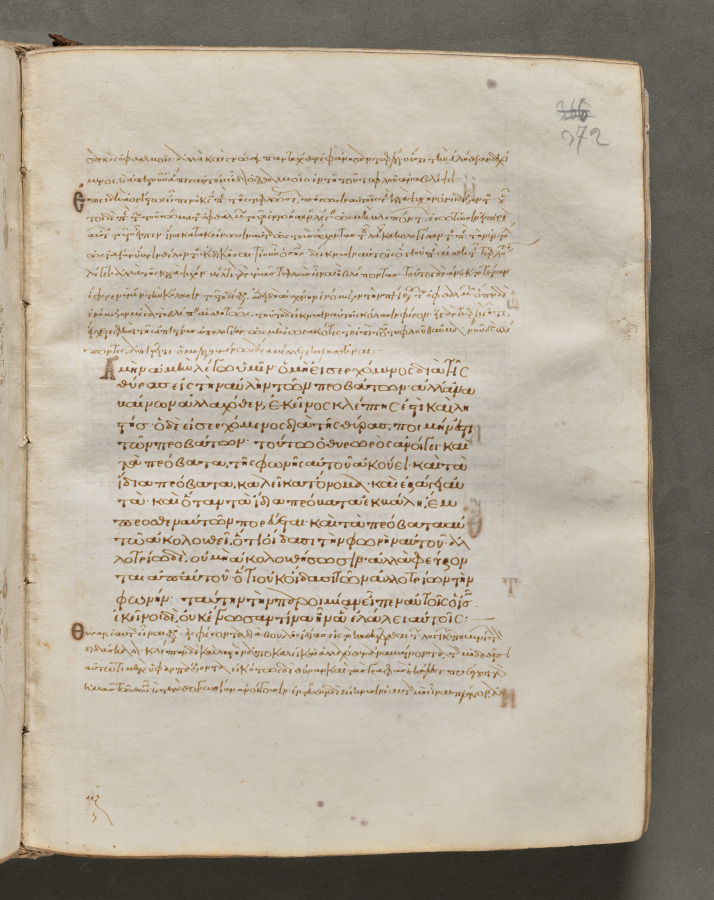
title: Text, folio 372 (recto), from a Gospel Book with Commentaries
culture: Byzantium, Constantinople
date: c. 1000–1100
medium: ink, tempera, and gold on vellum; leather binding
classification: Bound Volume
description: Each of the four gospels in this book opens on a page with brilliantly illuminated borders depicting the author of the text as well as birds—principally peacocks, symbols of the immortality of the soul—and fountains, representing the fountain of life and the salvation of the soul. This volume consists of 428 leaves with texts in Greek. Its level of sophistication suggests that it was probably written and decorated in a monastery in Constantinople.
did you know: Gospel books were carried in procession through Byzantine churches.